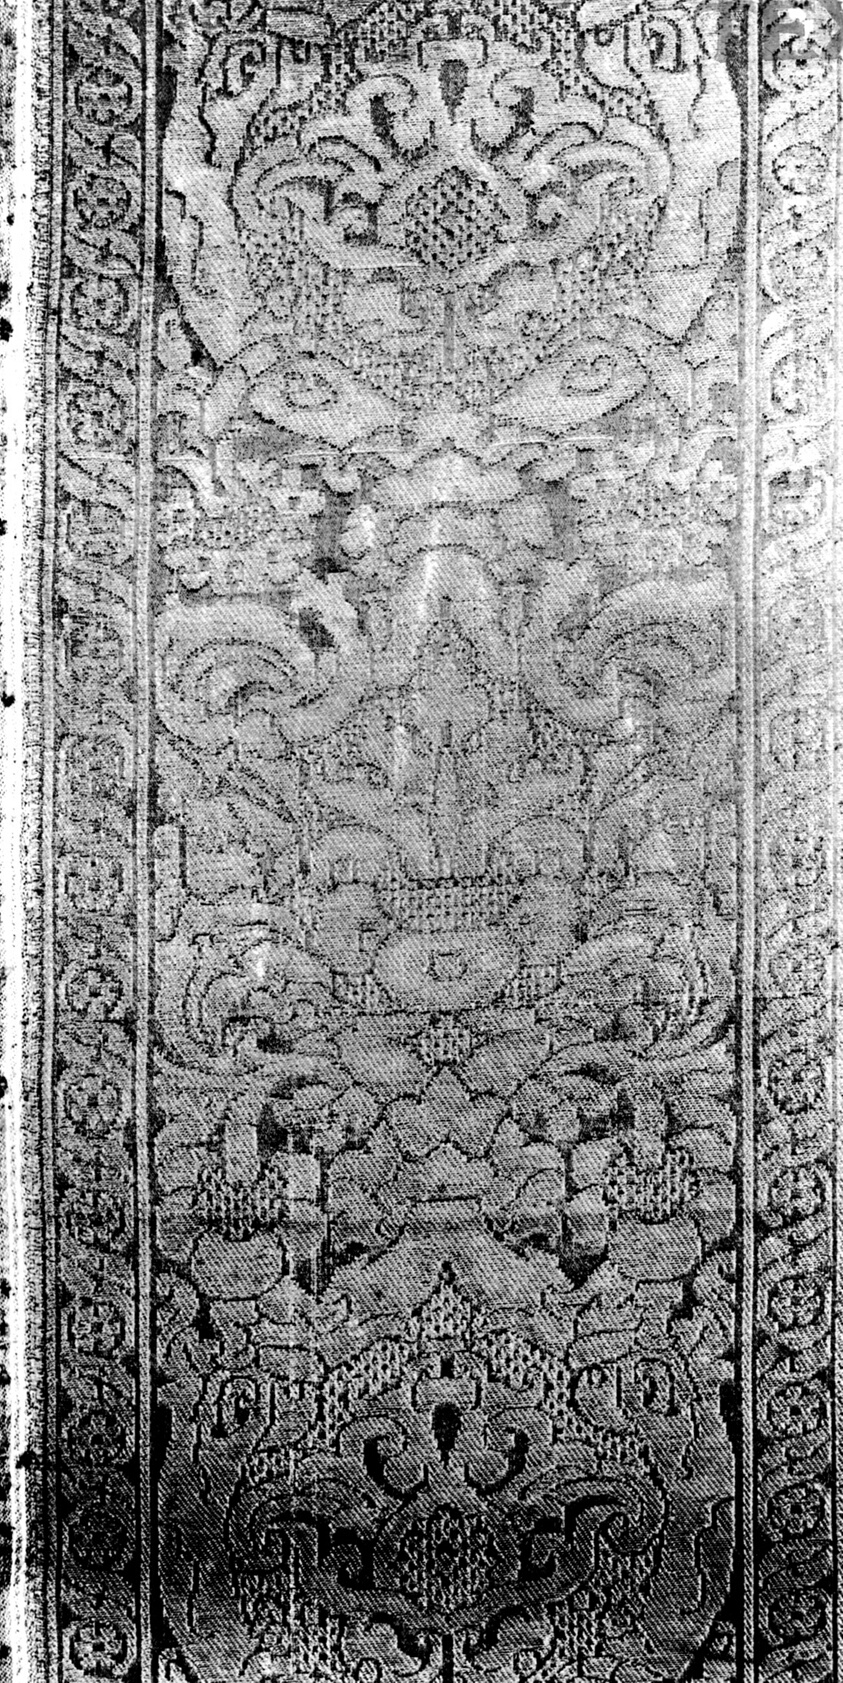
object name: Religious/Ritual Object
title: Orphrey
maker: Spain or Italy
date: 16th century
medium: Plain compound satin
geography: Spain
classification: textile; weaving; liturgical; ritual objects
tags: medallions, pineapples, flowers